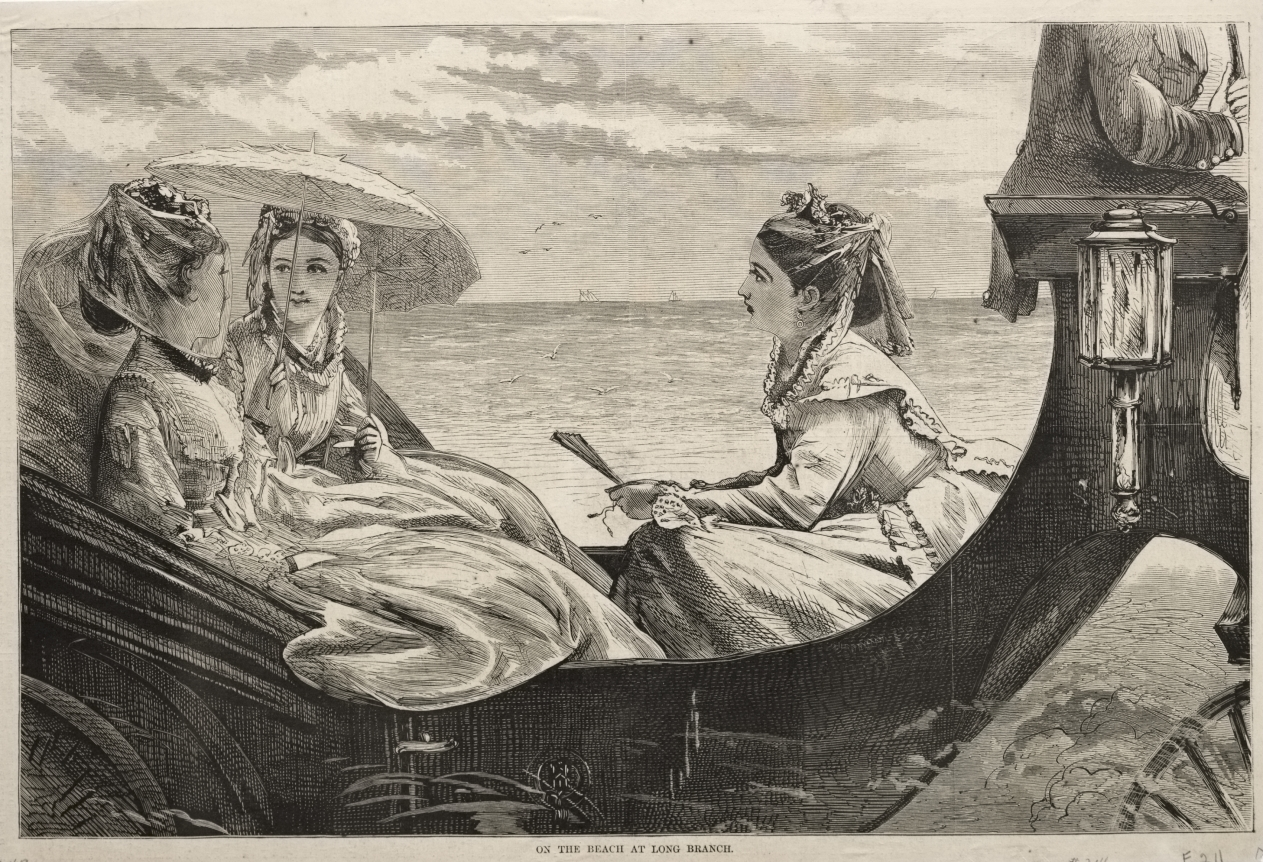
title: On the Beach at Long Branch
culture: America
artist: Winslow Homer (American, 1836–1910)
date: 1870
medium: wood engraving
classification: Print